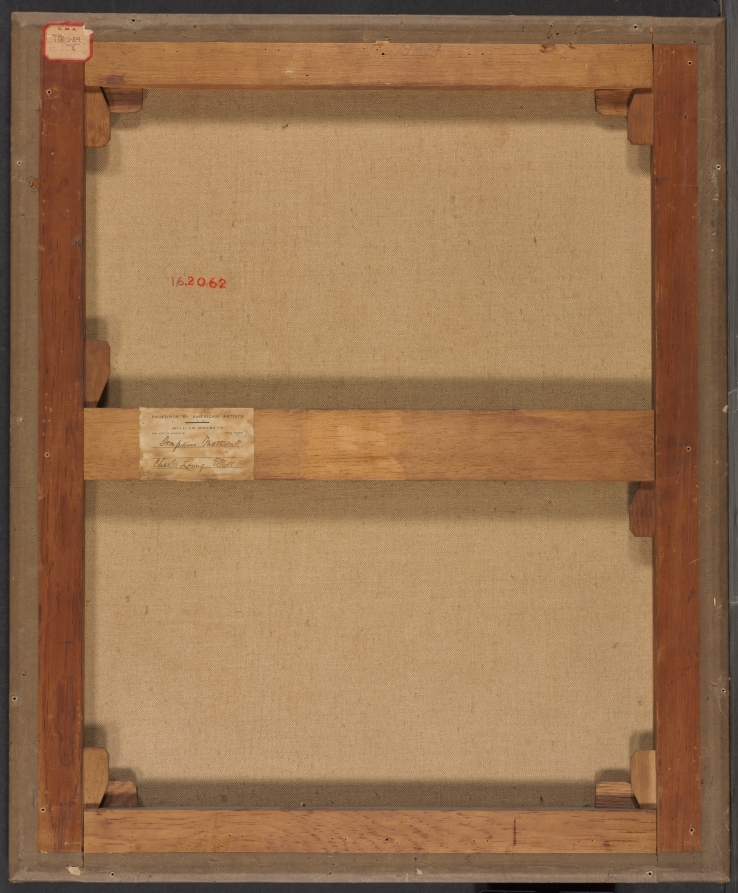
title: Tompkins Matteson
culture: America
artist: Charles Loring Elliott (American, 1812–1868)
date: c. 1840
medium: oil on canvas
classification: Painting